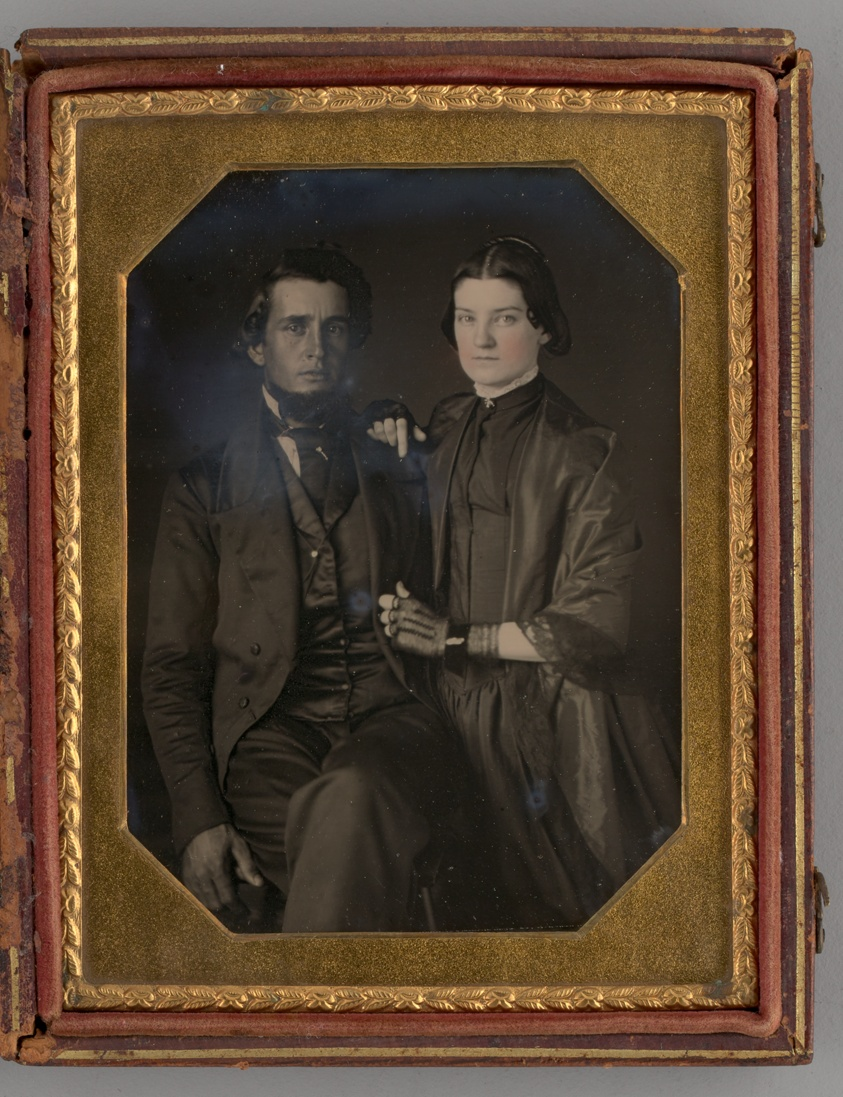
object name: Photograph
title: Untitled (Portait of a Woman and a Man)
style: 19th century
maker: Unknown maker; American, 19th century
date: 1855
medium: Daguerreotype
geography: United States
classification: portrait; photograph; photographic process; photography; portrait; daguerreotype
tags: lundberg collection, portraits, couples, portraits: female subject, portraits: male subject